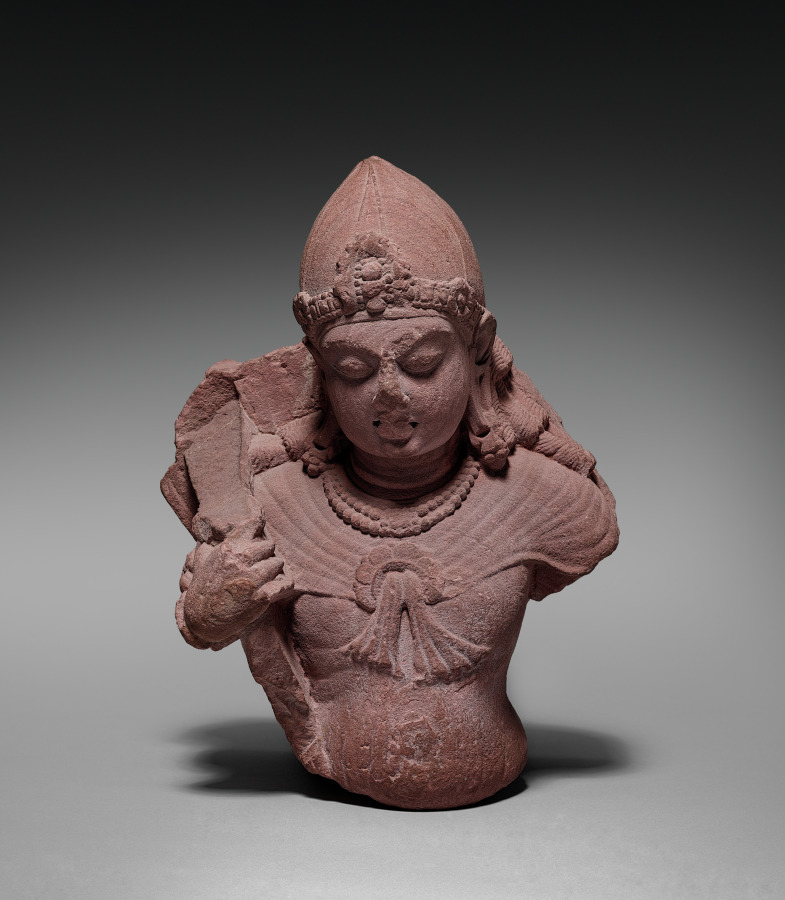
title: Attendant of Surya, the Sun God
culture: India, Mathura, Gupta Period (320-647)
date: 320–650 CE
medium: sandstone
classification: Sculpture